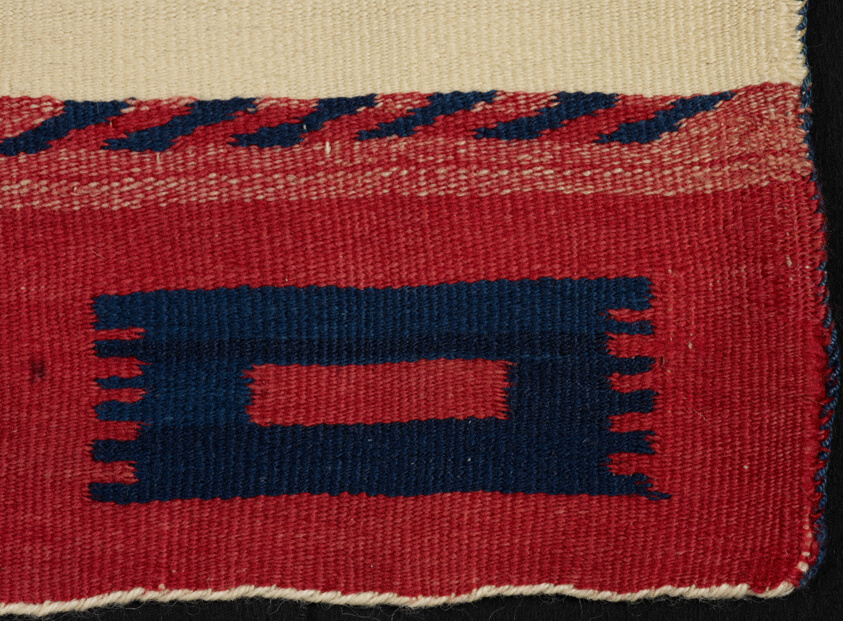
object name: Costume and Accessories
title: Wearing Blanket (Phase II)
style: navajo, americas, dine, 19th century, Arts of the Americas, indigenous, southwest, native american, north american, native north american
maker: Navajo (Diné) (Arizona, New Mexico, and Utah, United States)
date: 1850-65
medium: Wool; single interlocking tapestry weave; twined edges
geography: Navajo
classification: textile; blanket (covering); costume; garment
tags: geometric, arrow, squares, stripes